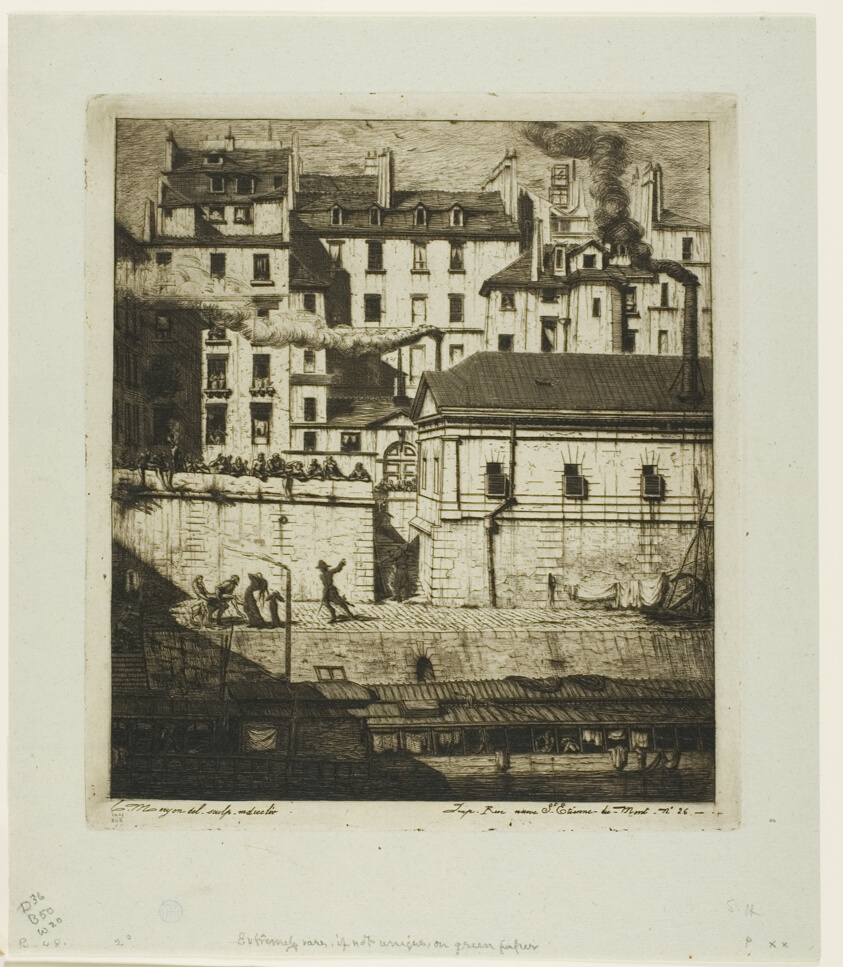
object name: Print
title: The Mortuary, Paris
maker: Charles Meryon (French, 1821-1868)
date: 1854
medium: Etching and drypoint in warm brown on verdâtre (greenish) laid paper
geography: France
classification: etching; print; prints and drawing